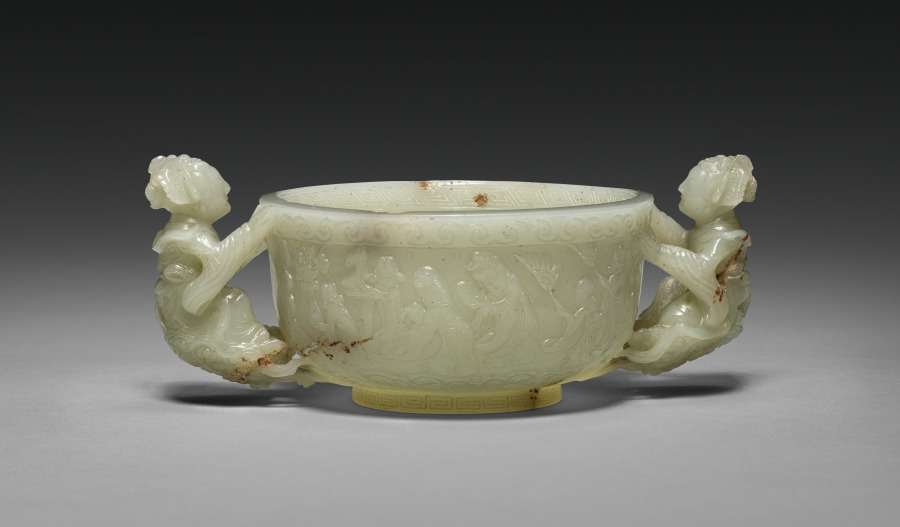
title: Cup with Daoist Figures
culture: China, Qing dynasty (1644–1911), Qianlong period (1736–95)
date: 1736–95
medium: Pale greenish-white jade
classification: Jade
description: During the Qing dynasty, Suzhou’s best products were sent north to the capital. Those that met imperial approval were sometimes graced with Qianlong’s mark, added by calligraphers and jade workers at court. The lack of a Qianlong mark on the Cleveland cup suggests that it might not have reached the court. Previously dated to the Yuan dynasty (1271–1368), new scholarship dates this cup to the Qing period.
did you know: Two female immortals serve as handles, while a Daoist procession with immortals, musicians, and attendants winds around the body of the cup.